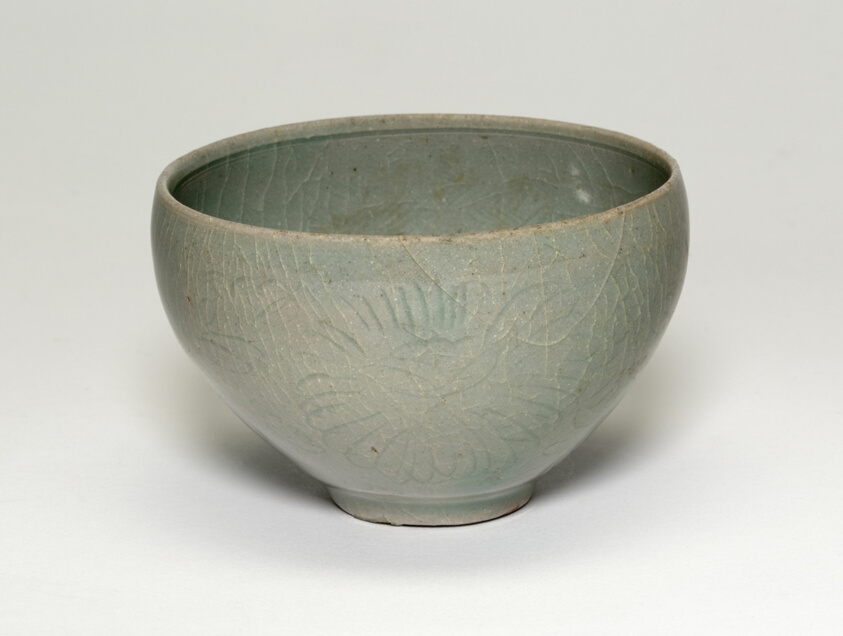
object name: Decorative Arts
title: Small Bowl with Peony Flowers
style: Korean (culture or style)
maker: Korea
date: Goryeo dynasty (918–1392), early 11th century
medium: Celadon-glazed stoneware with underglaze incised decoration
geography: Korea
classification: bowl; dish (vessel); asian art; ceramics; decorative arts